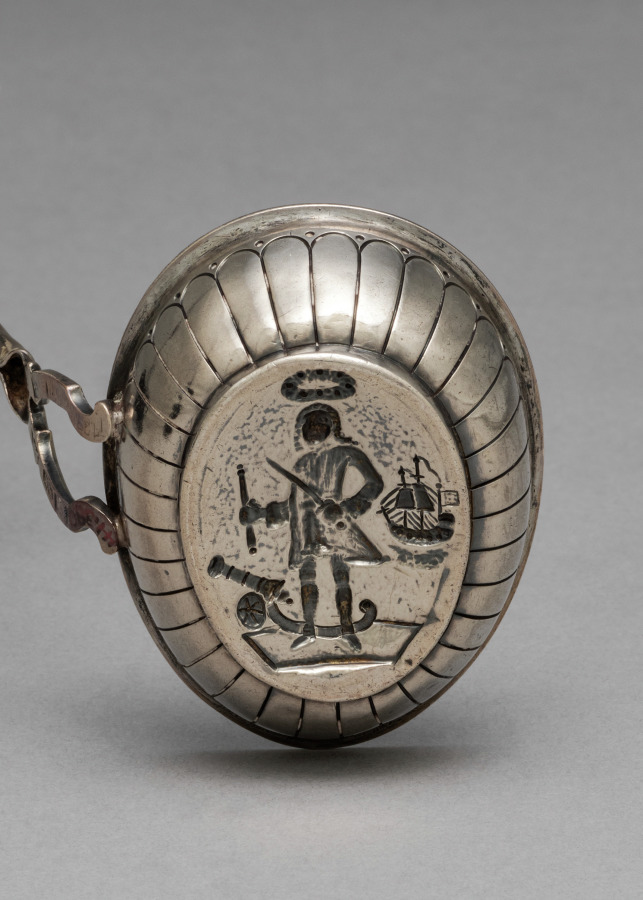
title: Ladle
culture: England, Exeter, 18th century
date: 1741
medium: silver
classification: Silver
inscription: engraved around edge: "The British Glory reviv'd by Admiral Vernon. He took Porto Bello with six ships only."